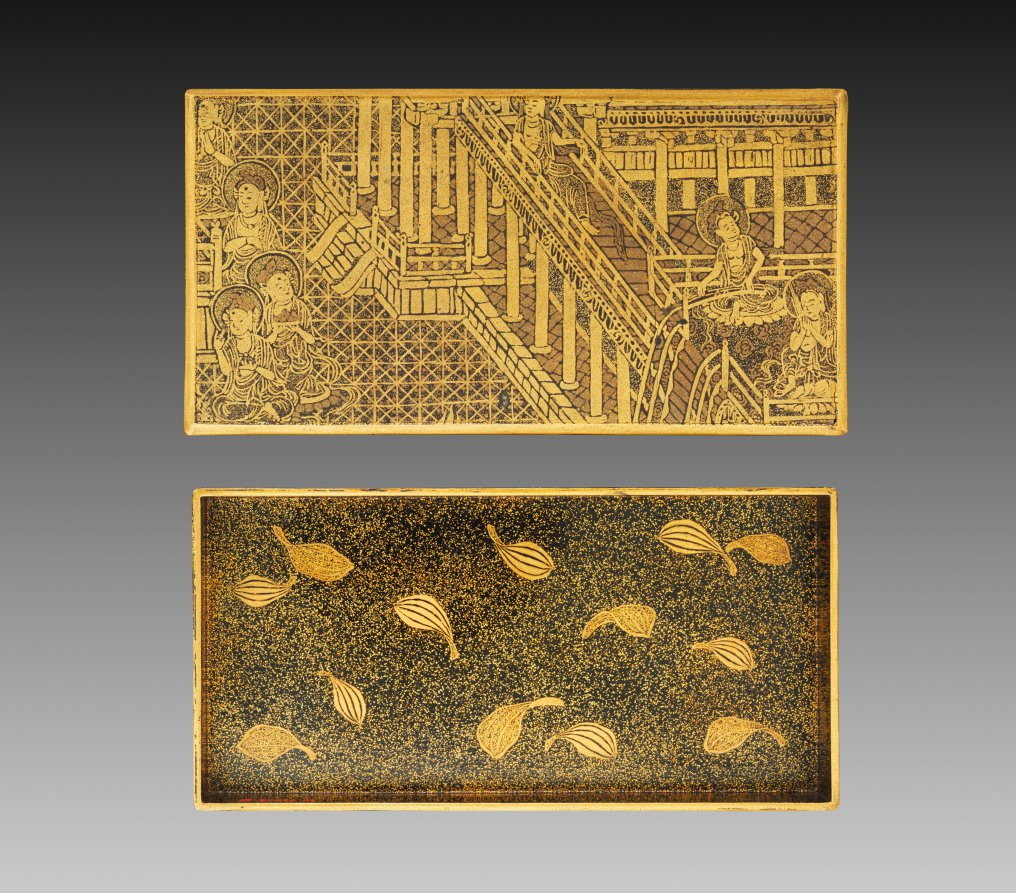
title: Fragment Mounted as a Box Cover with a Scene from Amida's Paradise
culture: Japan, Heian period (794–1185)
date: 1100s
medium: gold lacquer on wood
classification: Lacquer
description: The lid of this box has a fragment of an image representing the Pure Land of the Buddha Amida, and an interior decorated with lotus petals. The original, complete composition may have been a panel housed within a shrine cabinet, and used for meditation. An aversion to discarding sacred images likely led to the fragment’s incorporation into this small box.